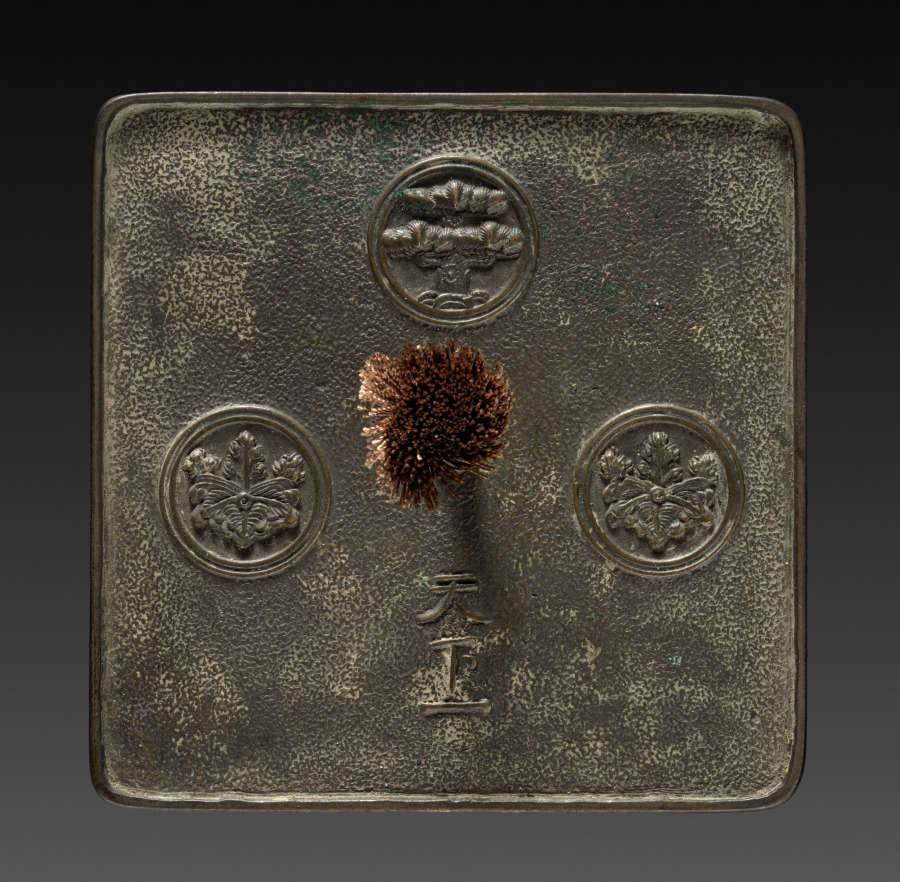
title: Mirror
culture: Japan, Muromachi period (1392–1573)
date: 1392–1573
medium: bronze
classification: Metalwork